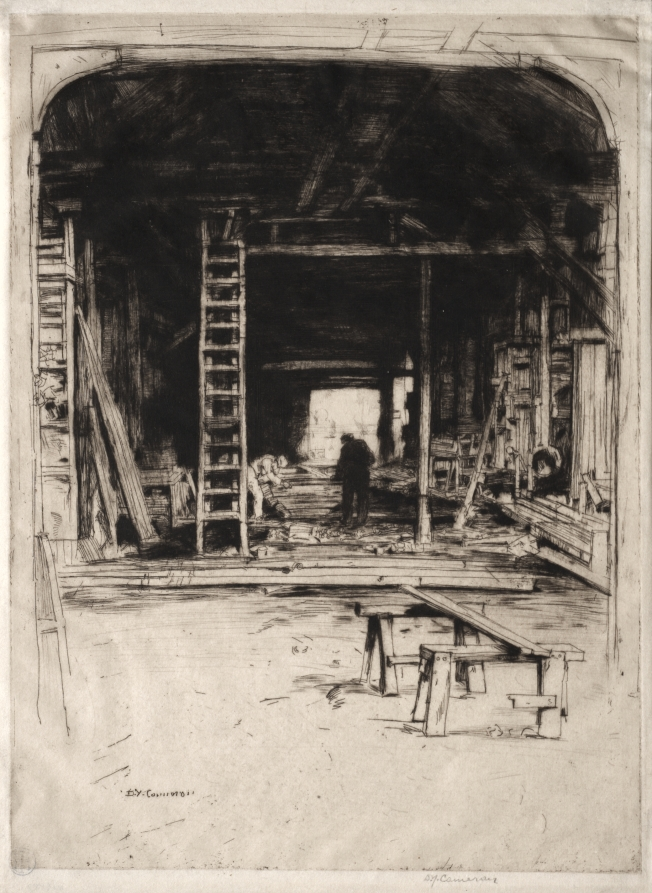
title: Robert Lee's Workshop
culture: England, early 20th Century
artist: David Young Cameron (British, 1865–1945)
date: 1905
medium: etching and drypoint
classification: Print